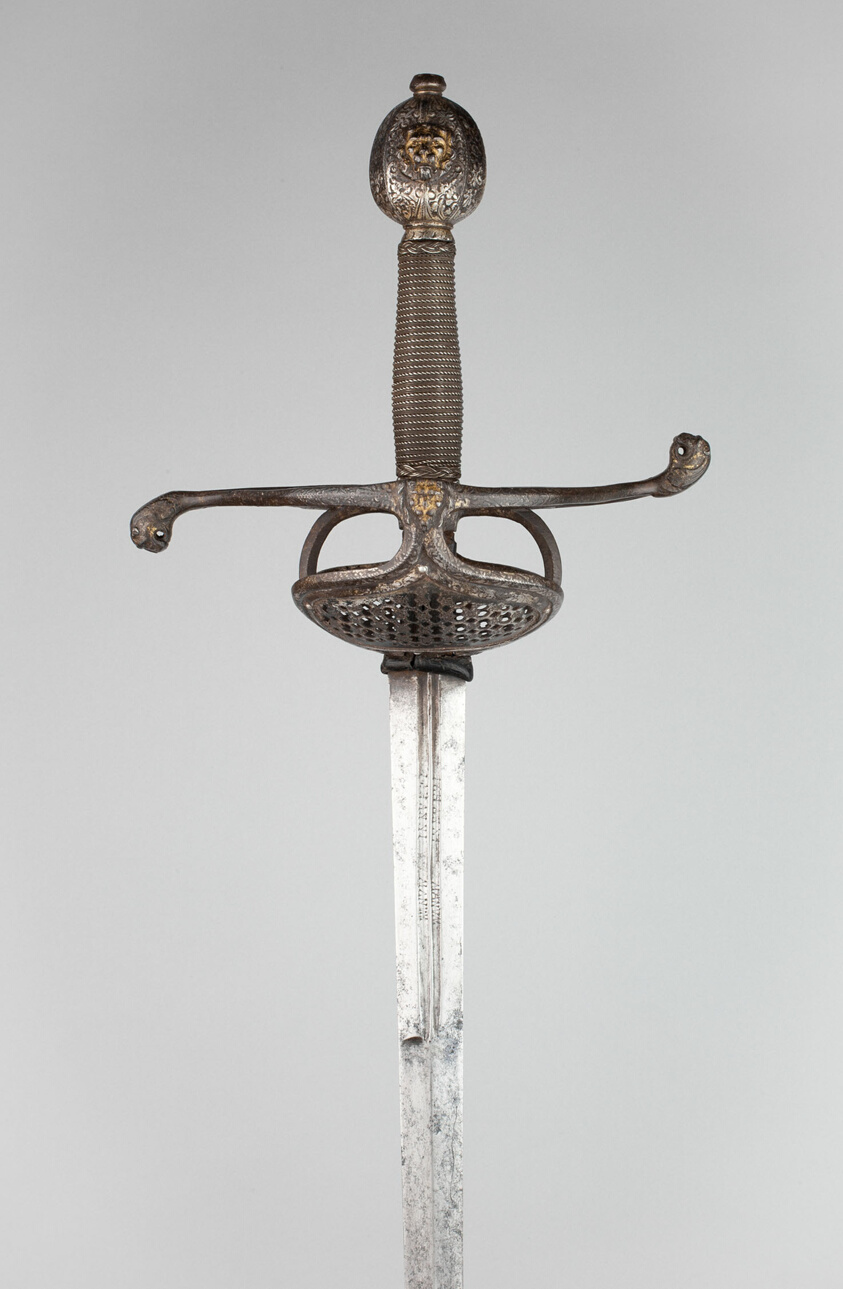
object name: Arms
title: Sword (Pappenheimer Rapier)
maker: Dutch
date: c. 1630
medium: Steel, silver, gilding, wood, and leather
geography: Netherlands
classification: edged weapon-sword; arms; arms and armor